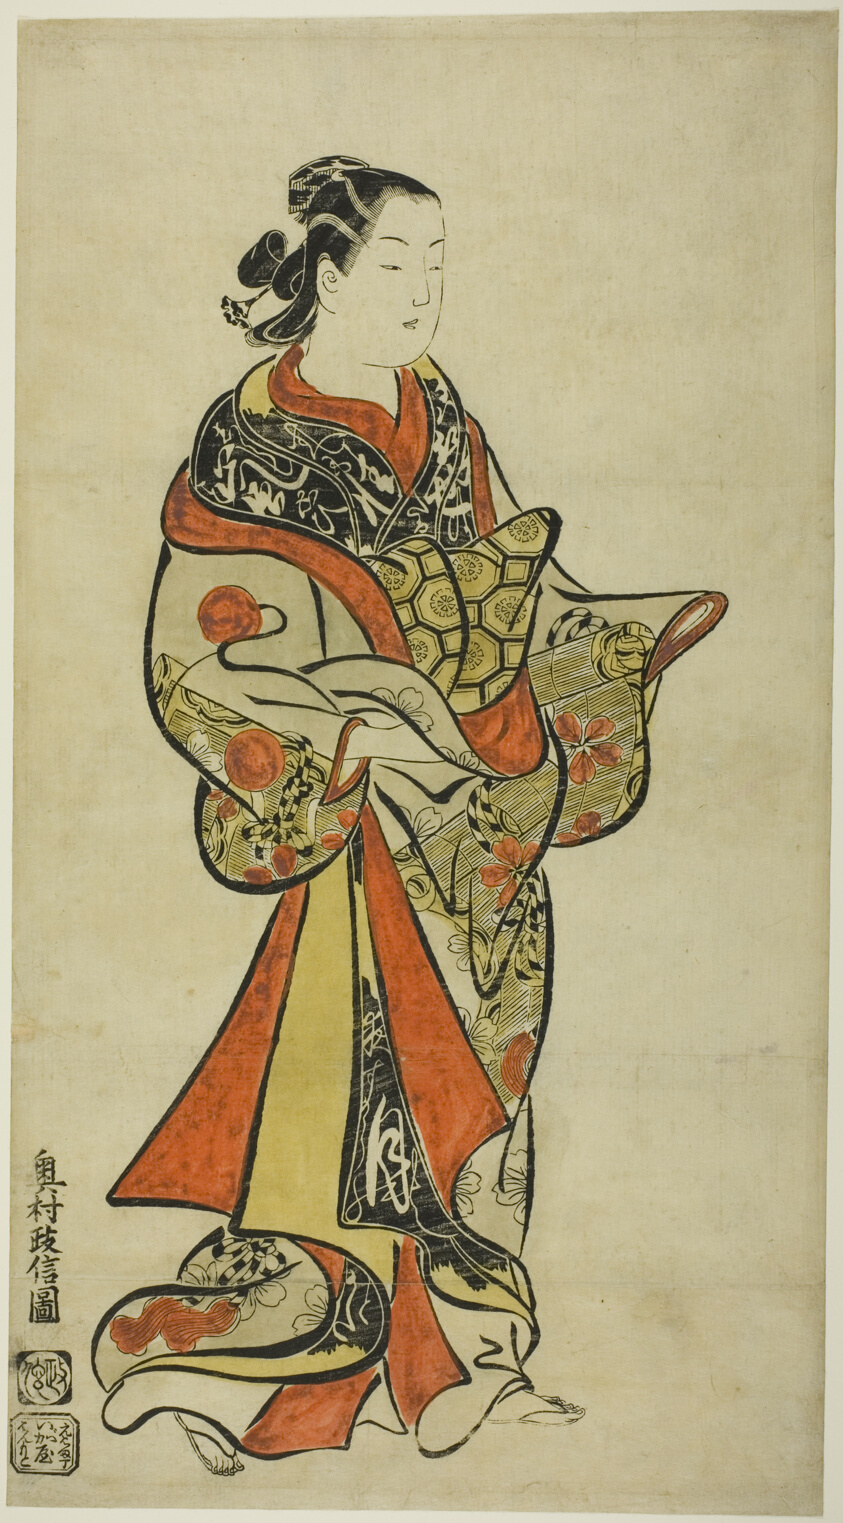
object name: Print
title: Standing Courtesan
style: Japanese (culture or style)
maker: Okumura Masanobu (Japanese, 1686-1764)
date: 1710s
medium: Hand-colored woodblock print; o-oban, sumizuri-e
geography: Japan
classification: woodblock print; print; asian art